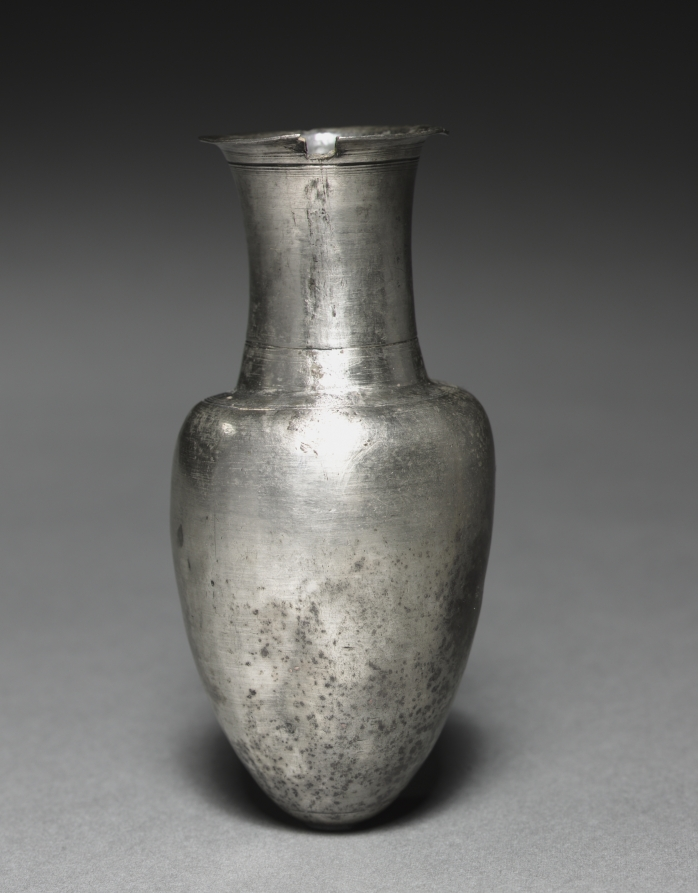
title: Amphoriskos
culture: Greece, late Hellenistic period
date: 200–1 BCE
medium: silver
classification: Metalwork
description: Though now missing both of its original handles, this silver vessel is a miniature version of an amphora, known in Greek as an amphoriskos. Such miniature vessels, made from silver or other materials, were used from the 6th century BCE onwards to store perfumes or scented oils.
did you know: This amphoriskos is made of a single sheet of raised silver.